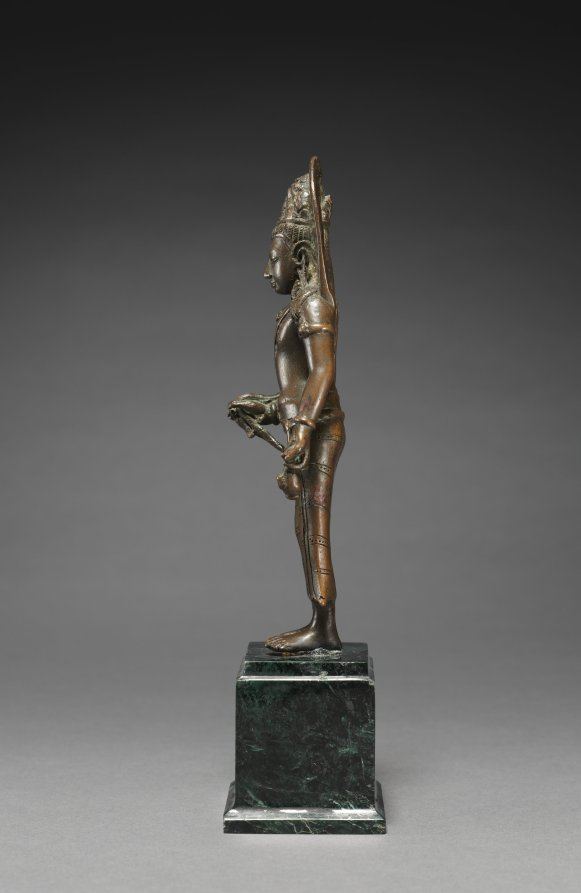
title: Padmapani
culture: Java, Pagan, Sailendra Period, 8th-9th Century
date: 700s-800s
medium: copper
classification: Sculpture